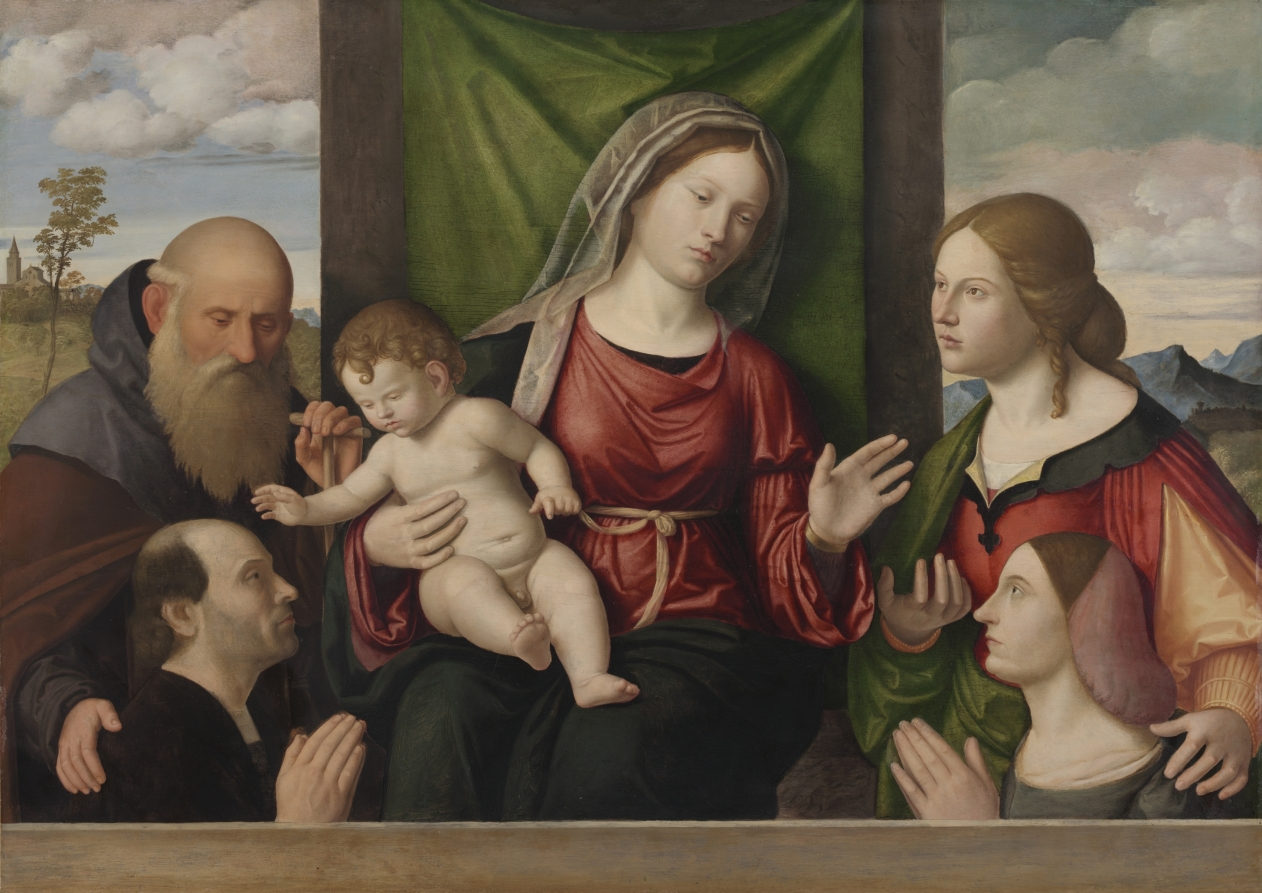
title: Virgin and Child with Saints and Donors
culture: Italy, Venice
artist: Giovanni Battista Cima da Conegliano (Italian, c. 1459–1518)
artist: and Workshop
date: c. 1515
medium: oil on wood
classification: Painting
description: This work reinterprets the most common subject in Renaissance art—the Madonna and Child. The tender relationship of mother and son spoke to Mary’s role as intercessor for humanity, sparked an empathetic relationship with Christ, and helped invest Christian practice with tenderness and compassion. Works at this scale were usually for private devotion, but distinct styles and refined craftsmanship were also appreciated for their artistry and creativity. Here the donors occupy the same landscape as the holy figures, emphasizing how Mary’s compassion extends into our world. This painting was never finished, visible in Saint Anthony Abbot’s beard and the female saint’s empty hand, which makes her identity impossible to pin down.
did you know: The two figures who kneel with their hands clasped are likely the donors who commissioned this painting.